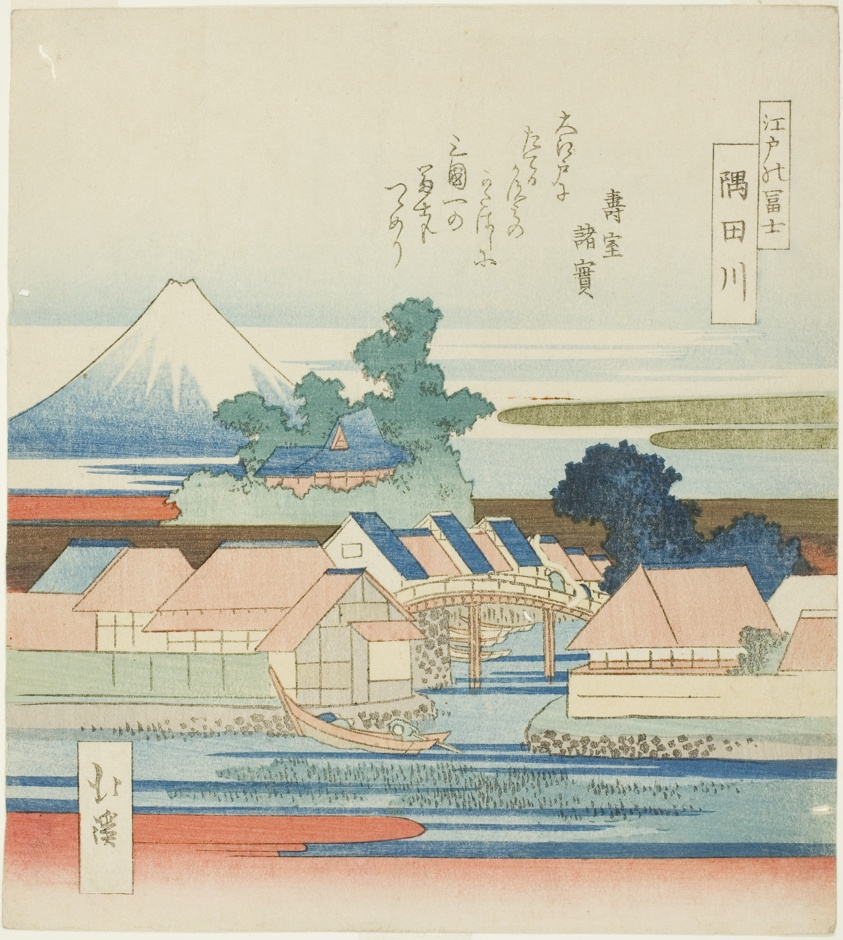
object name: Print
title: The Sumida River (Sumidagawa), from the series "View of Mount Fuji from Edo (Edo no Fuji)"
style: Japanese (culture or style)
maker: Totoya Hokkei (Japanese, 1780–1850)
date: c. 1832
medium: Color woodblock print; shikishiban, surimono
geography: Japan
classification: woodblock print; print; asian art